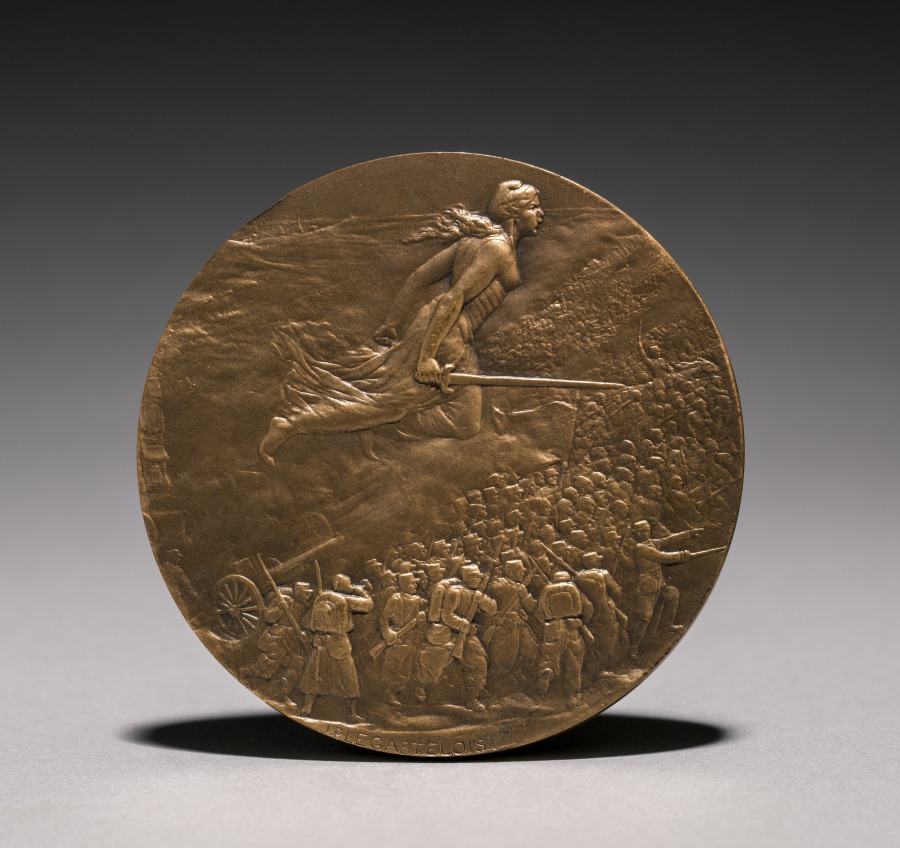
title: Medal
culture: France, 20th century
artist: Jules Prosper Legastelois (French, 1855–1931)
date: 1914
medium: bronze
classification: Metalwork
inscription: Bataille de la Marne, September, 1914.